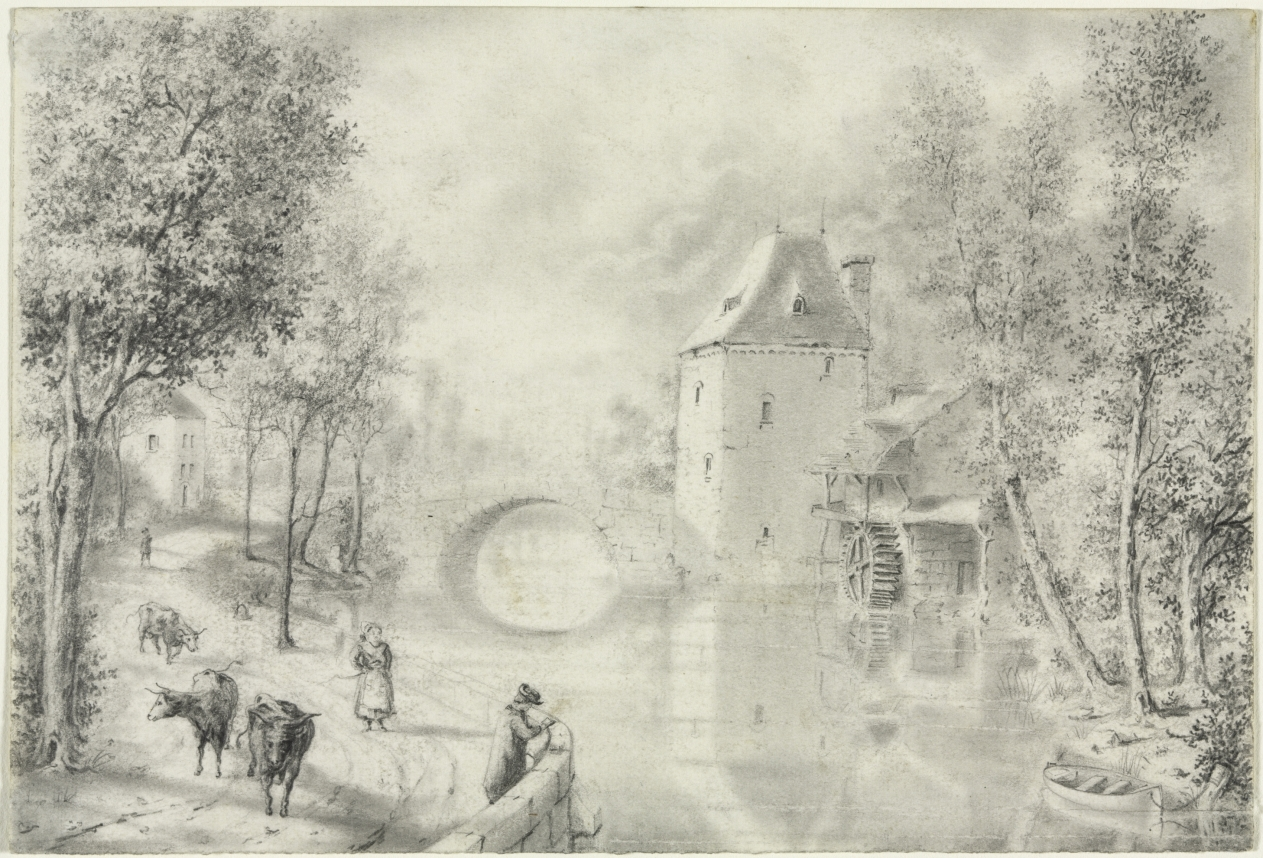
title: Road by the Old Bridge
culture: Netherlands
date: 1800s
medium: graphite, with stumping and stylus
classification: Drawing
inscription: VERSO, upper right, in graphite: Le chemin du vieux pont ; center right, in graphite: Souvenir amical / [illegible initials] ; lower right, in graphite: no good ; upper left, in red pencil: 5°° [zeros underlined] ; upper right, in red pencil: A 39 ;